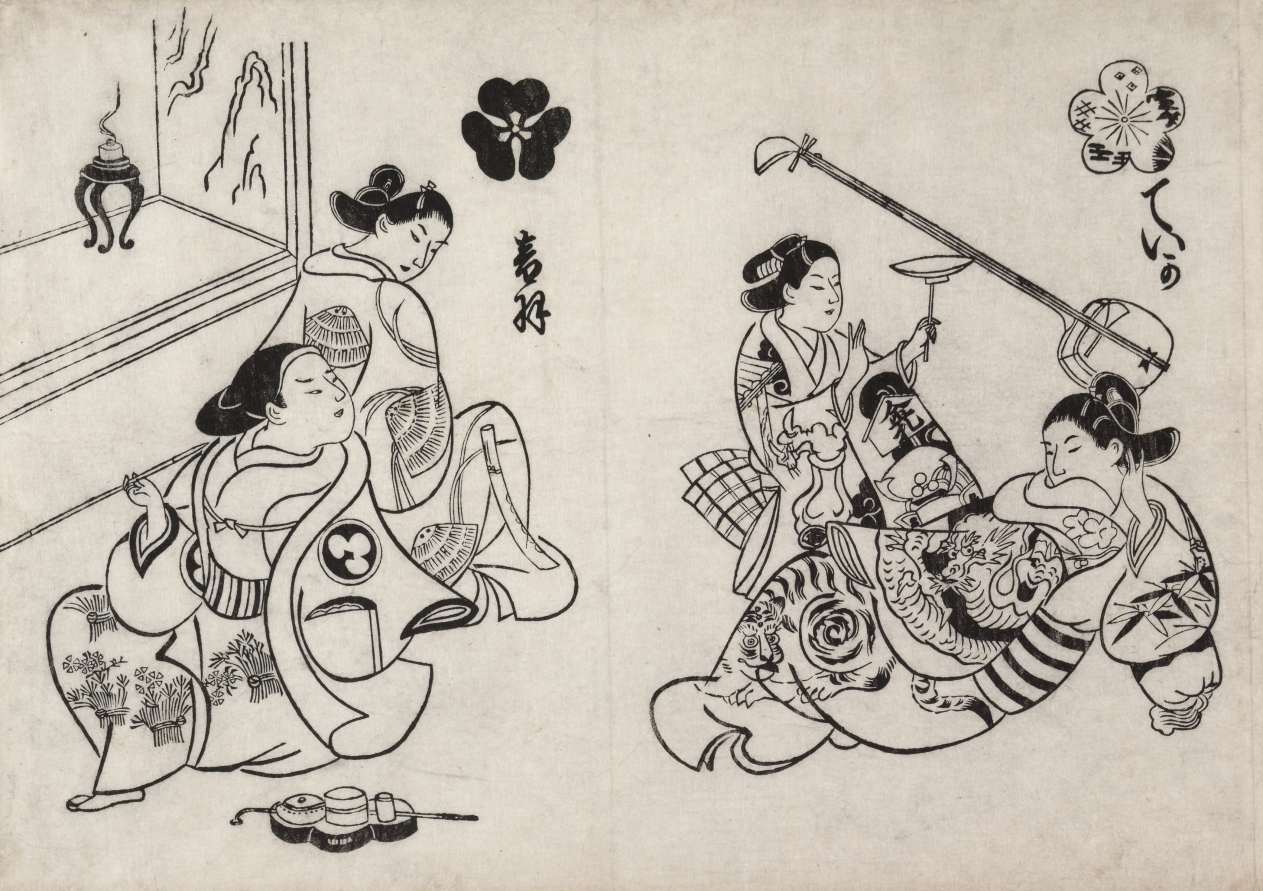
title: Three Courtesans with a Client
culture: Japan, Edo period (1615–1868)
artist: Okumura Masanobu (Japanese, 1686–1764)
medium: color woodblock print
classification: Print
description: This double-page book illustration is called a sumizuri (meaning to print with sumi ink on paper). It may be an adaptation of a picture book by Kiyonobu I titled Keisei ehon, or Illustrated Book of Courtesans, portraying the most glamorous people in the ukiyo-e world. Masanobu had the greatest influence on the development of the ukiyo-e style during the first half of the 1700s. A publisher, print designer, and painter, he initiated new genres of prints such as the "perspective picture" (uki-e).